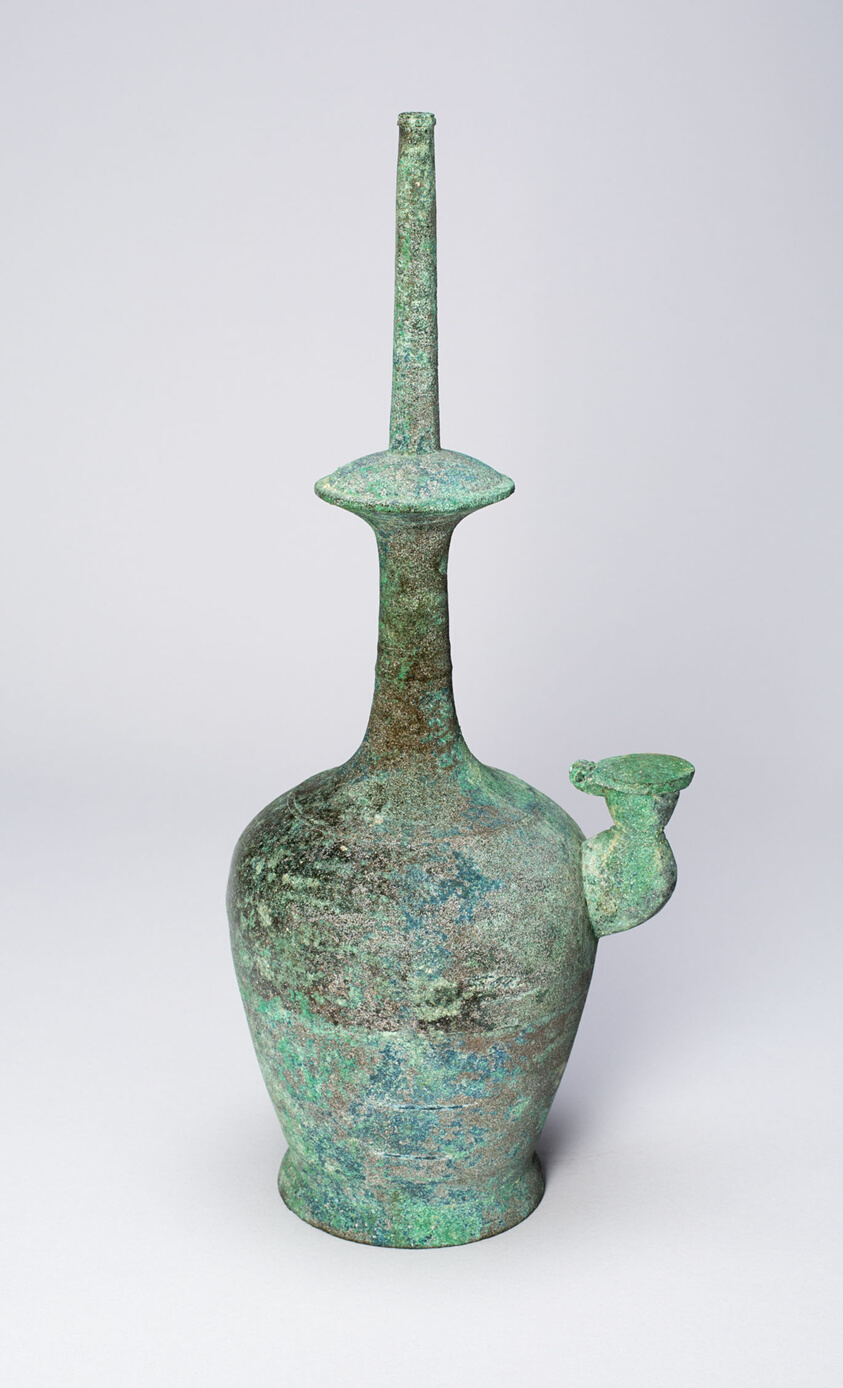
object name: Religious/Ritual Object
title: Water Bottle (Kundika)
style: Korean (culture or style)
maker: Korea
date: Goryeo dynasty (918–1392)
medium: Bronze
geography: Korea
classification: bronze; metal; vessel; asian art; ritual objects